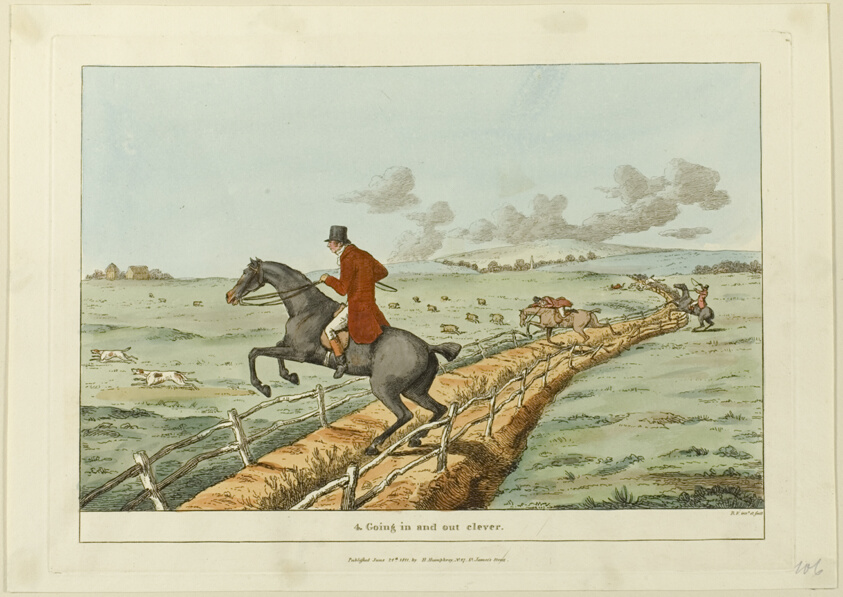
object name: Print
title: Going In and Out Clever, plate four from Insidspensable Accomplishments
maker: Sir Robert Frankland (English, 1784-1849); published by Hannah Humphrey (English, c. 1745-1818)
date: published June 24, 1811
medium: Hand-colored etching on paper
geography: England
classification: etching; print; prints and drawing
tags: dogs, animals